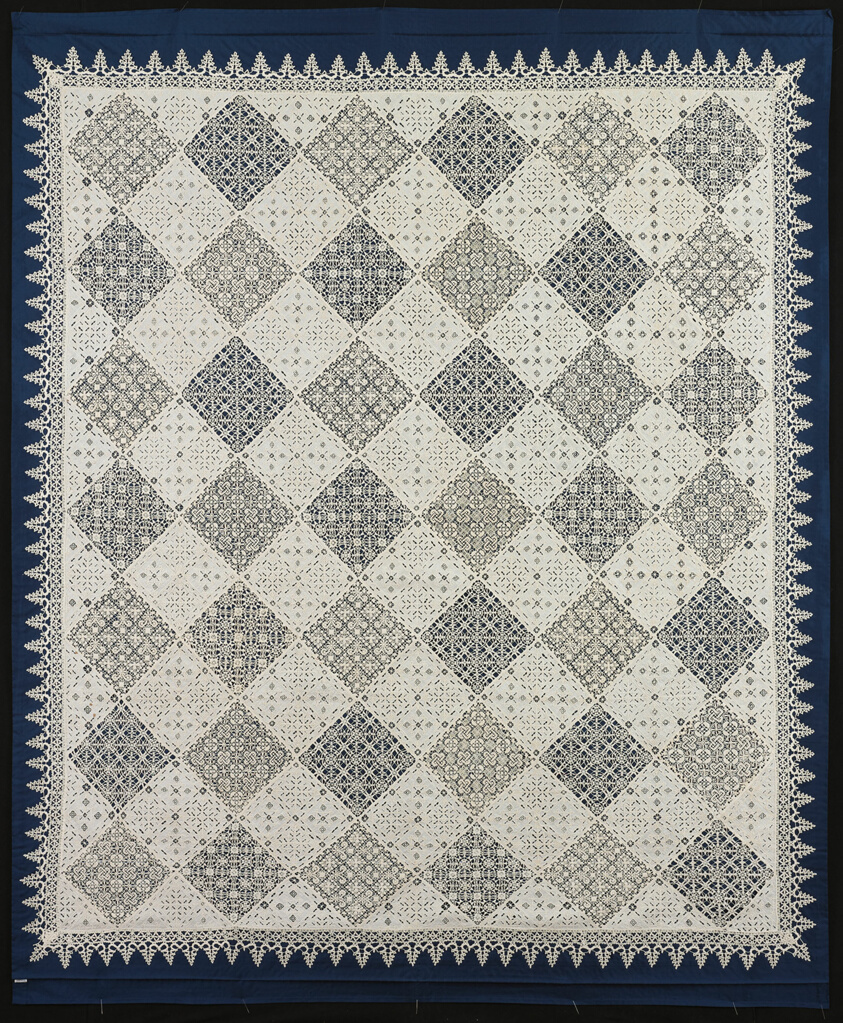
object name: Textile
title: Cover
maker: Italy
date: Late 16th/early 17th century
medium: 30 squares and 26 triangles of linen, plain weavw; pieced; embroidered with linen in overcast stitches and laid work and couching; cut and drawn work with inserts of needle lace; and 42 squares of linen, needle lace; pieced; edged with linen, bobbin lace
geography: Italy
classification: textile; needlework (visual works)